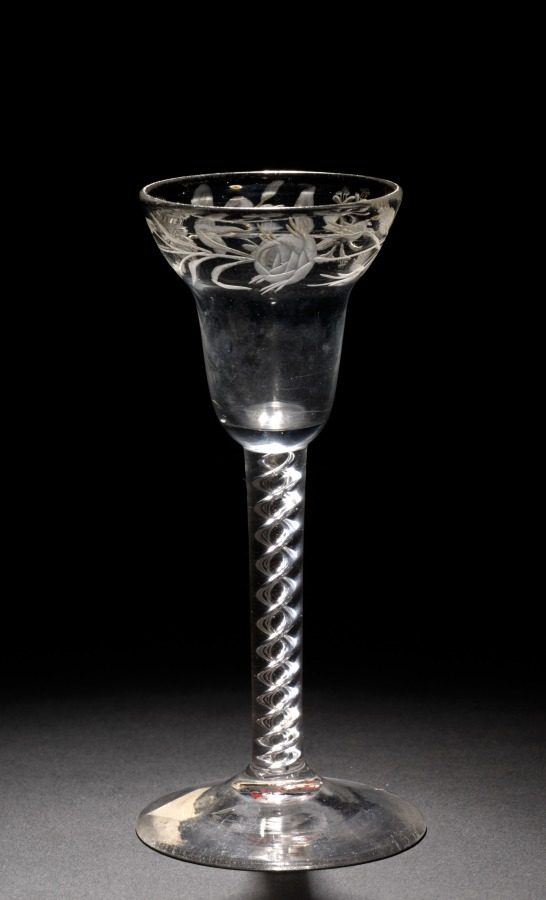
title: Wine Glass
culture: England, 18th century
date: 1750–1799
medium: glass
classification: Glass